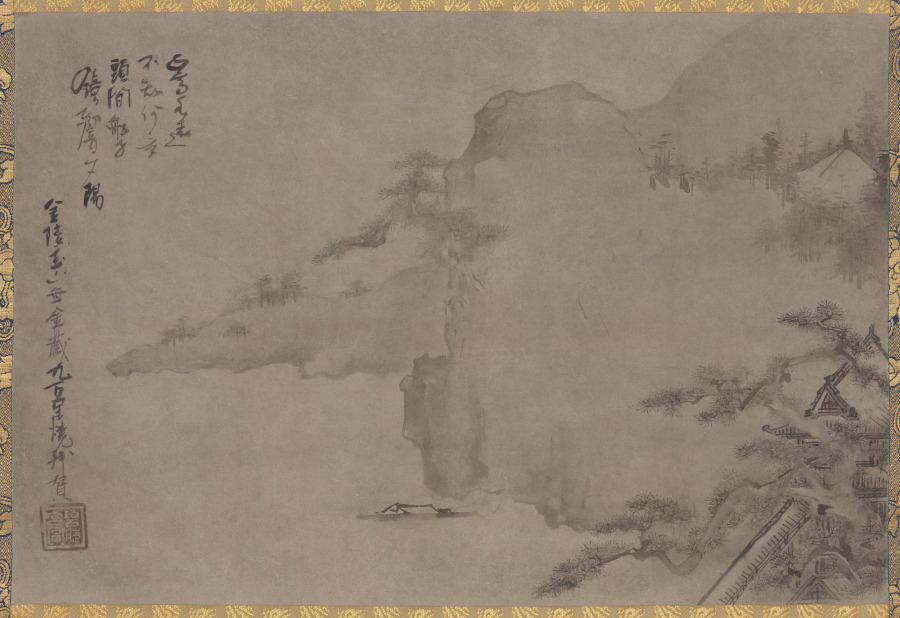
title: Coastal Landscape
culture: Japan, Momoyama period (1573–1615)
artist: Iwasa Matabei (Japanese, 1578–1650)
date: 1573–1615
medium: hanging scroll; ink on paper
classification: Painting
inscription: signed: signature unread